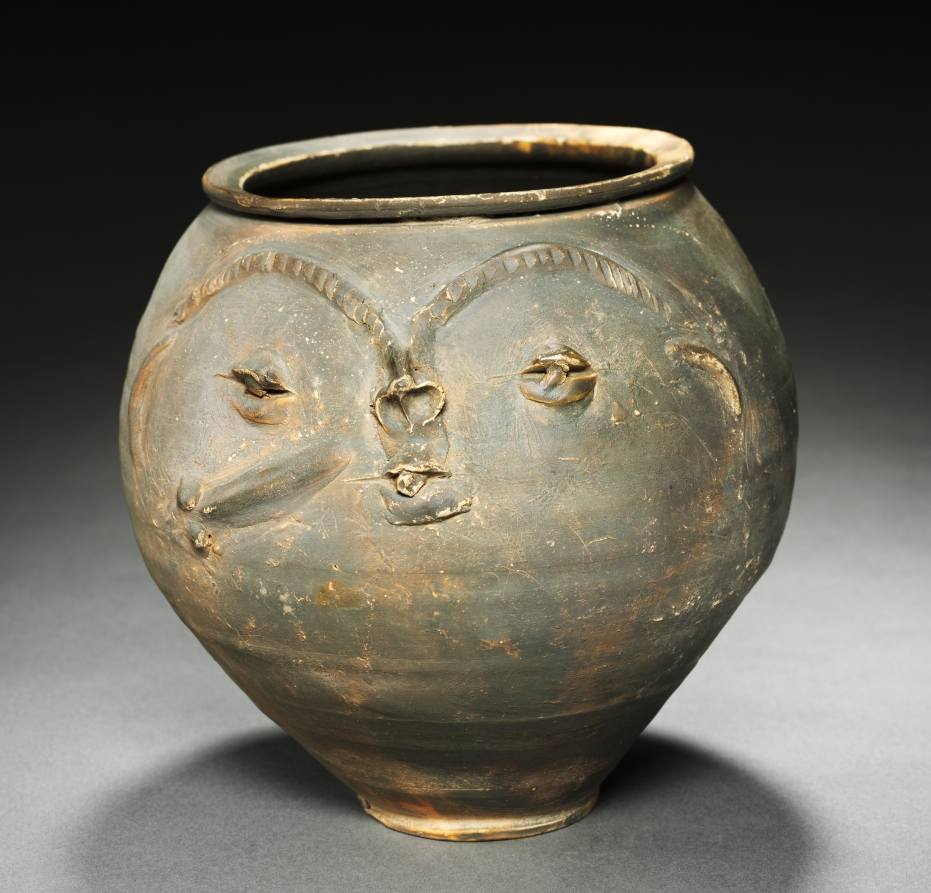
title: Face Urn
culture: Rhenish (Cologne), Gallo Roman, 2nd quarter, 1st Century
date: 25–50 CE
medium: reddish ware with gray burnished slip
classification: Ceramic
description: This wheel-thrown vase is decorated with humanlike facial features and a phallus applied to the face’s cheek. Wide arching eyebrows meet at the short bridge of the face’s puggy nose, which sits over lips pursed around its protruding tongue. Finger marks can be seen around the eyes and eyebrows where clay was added onto the surface of the vessel to form the facial features.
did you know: The phallus was often used as a protective symbol in the ancient world.